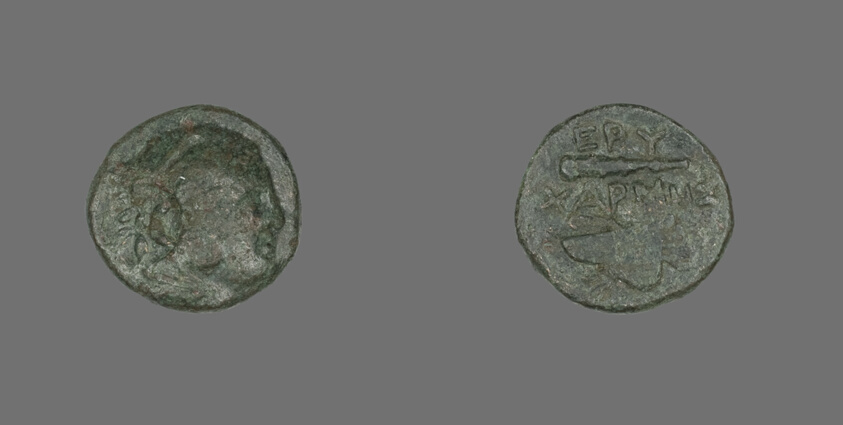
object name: Coin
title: Coin Depicting the Hero Herakles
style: greek, ancient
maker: Greek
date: 4th century BCE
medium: Bronze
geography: Ancient Greece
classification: coin; ancient art